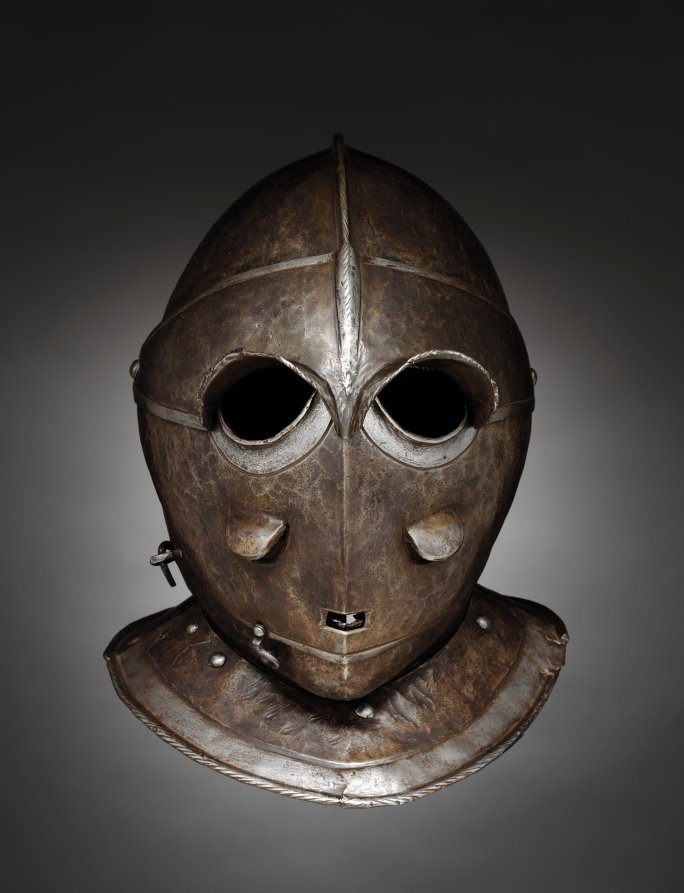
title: Savoyard Helmet (Todenkopf)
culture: Italy or Germany, early 17th century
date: c. 1600–20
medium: steel, blackened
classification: Arms and Armor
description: The term “Savoyard helmet” is used today to evoke the elite cavalry units formed by Charles Emanuel I, Duke of Savoy (1580-1630). Such helmets were designed principally to withstand and protect the wearer from shot from the powerful wheel-lock guns of the day, though their secondary function was to intimidate and terrify. The design of the helmet suggests a human face or skull. They were known as todenkopf or “death’s head” helmets in Germany. The helmet would have originally been associated with a three-quarter cuirassier armor. Similar armors are displayed nearby.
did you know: This type of helmet is also called a "todenkopf," translating to "death's head."